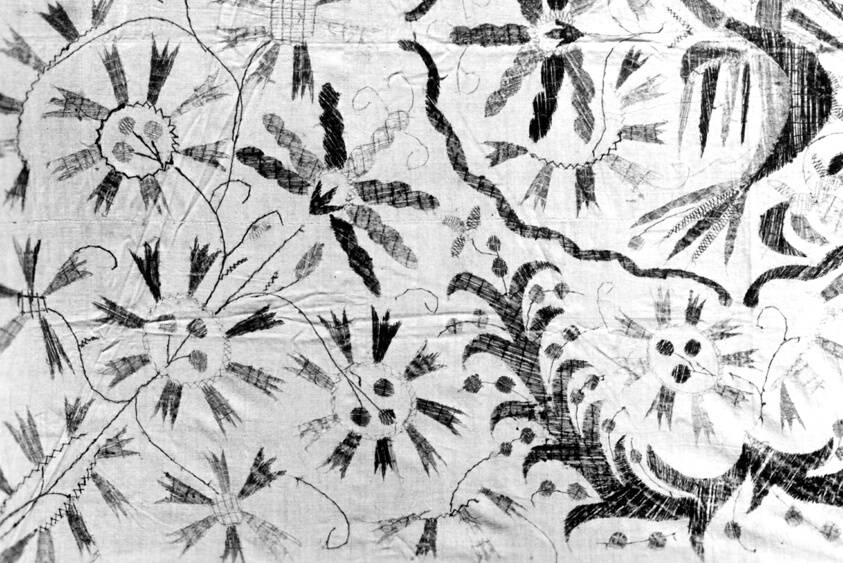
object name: Textile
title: Cover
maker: Spain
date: 19th century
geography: Spain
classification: textile; needlework (visual works)